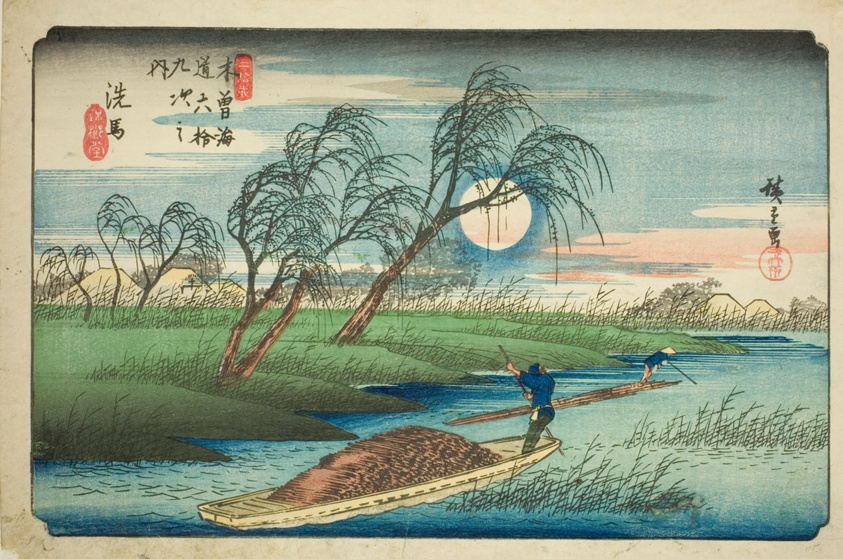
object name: Print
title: No. 32: Seba, from the series "Sixty-nine Stations of the Kisokaido (Kisokaido rokujukyu tsugi no uchi)"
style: Japanese (culture or style)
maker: Utagawa Hiroshige 歌川 広重; Japanese, 1797-1858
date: c. 1835/38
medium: Color woodblock print; oban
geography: Japan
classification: woodblock print; print; asian art